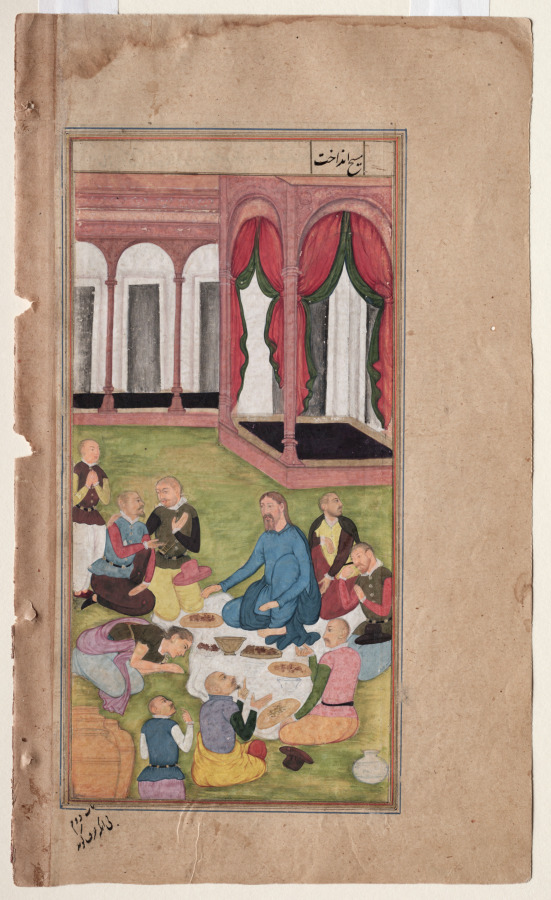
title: Mary Magdalene Presents Ointment to Jesus (folio 102 verso), from a Mirror of Holiness (Mir’at al-quds) of Father Jerome Xavier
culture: Mughal India, Allahabad, made for Prince Salim (1569–1627)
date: 1602–04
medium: Gum tempera, ink, color, and gold on paper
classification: Manuscript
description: While Jesus dined in the house of a Pharisee he was approached by Mary Magdalene, who threw herself to the ground and wept on Jesus’s feet with her tears. She then dried them with her hair and bathed them with expensive ointment. Her veil falls around her shoulders to reveal her hair’s disarray. Only Jesus appears to be calm as he extends his arms in a pacifying gesture; the other men point at their mouths and at each other, astonished at the dramatic behavior of this woman known to have been a prostitute. The plain black carpets and thin application of paint in some areas indicate that this painting was not finished.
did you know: Proportions of the portico and pavilion reveal some grasp of Renaissance ideals.